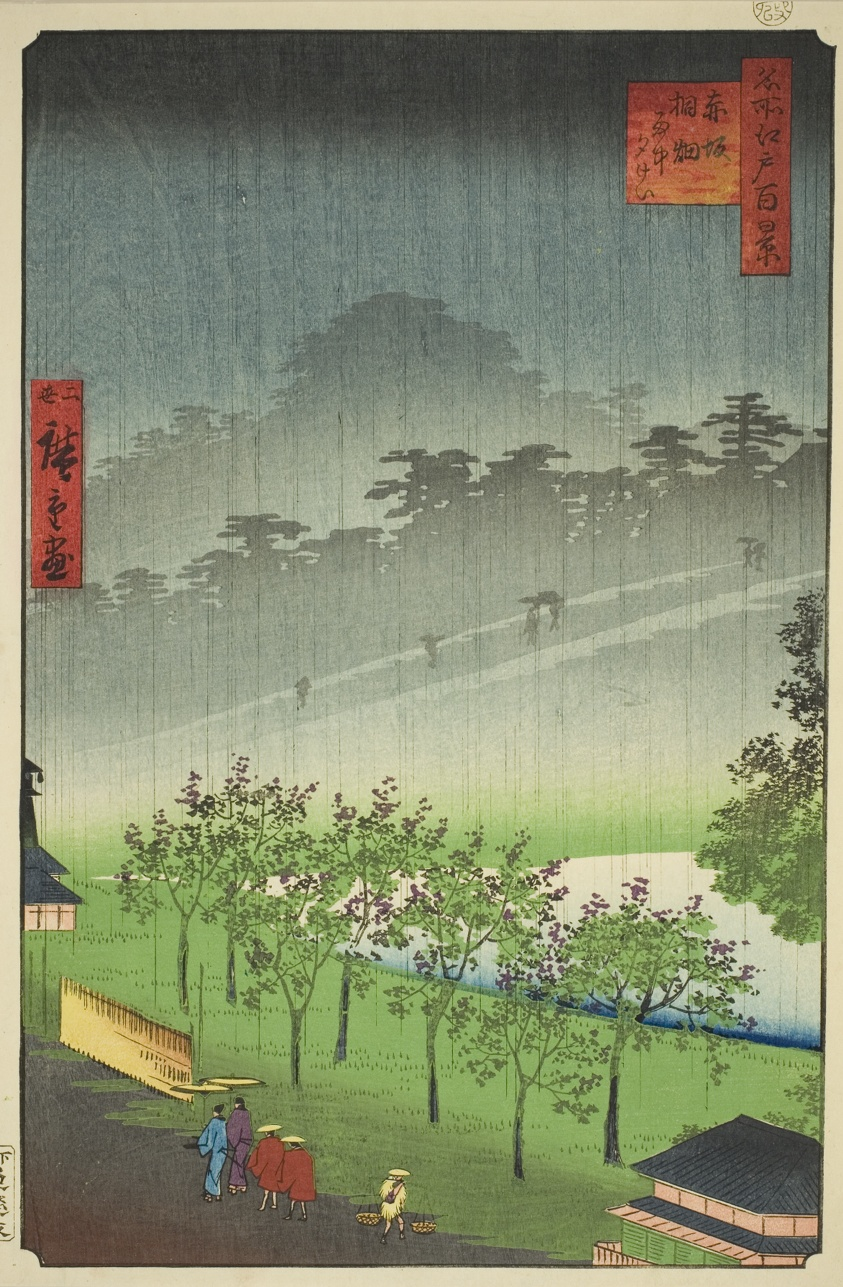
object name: Print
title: Night Rain at the Paulownia Grove at Akasaka (Akasaka Kiribatake uchu yukei), from the series "One Hundred Famous Views of Edo (Meisho Edo hyakkei)"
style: Japanese (culture or style)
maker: Utagawa Hiroshige II (Shigenobu) (Japanese, 1826-1869)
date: 1859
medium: Color woodblock print; oban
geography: Japan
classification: woodblock print; print; asian art